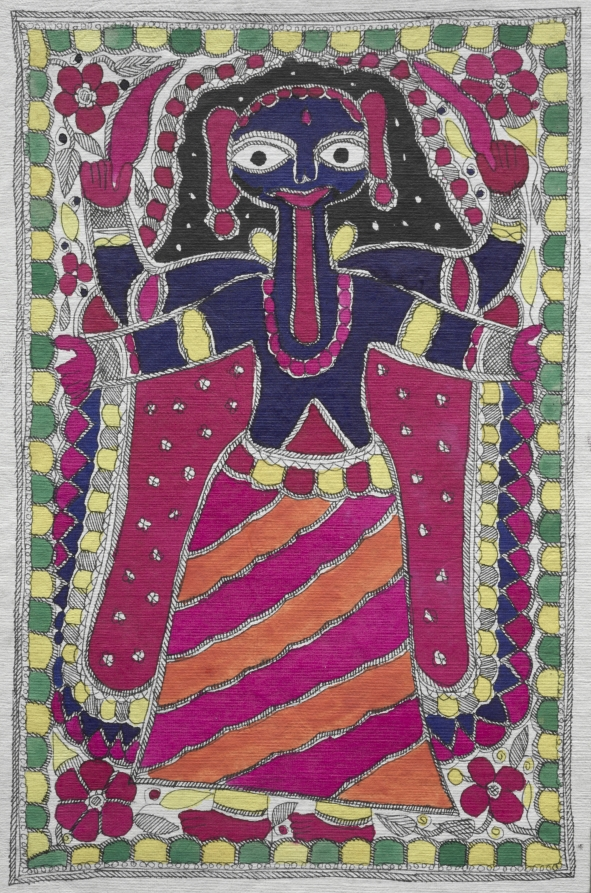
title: Devotional painting (female figure)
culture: Eastern India, Bihar State, Mithila or Madhubani School, 20th century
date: 1900s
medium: ink and color on paper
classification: Painting